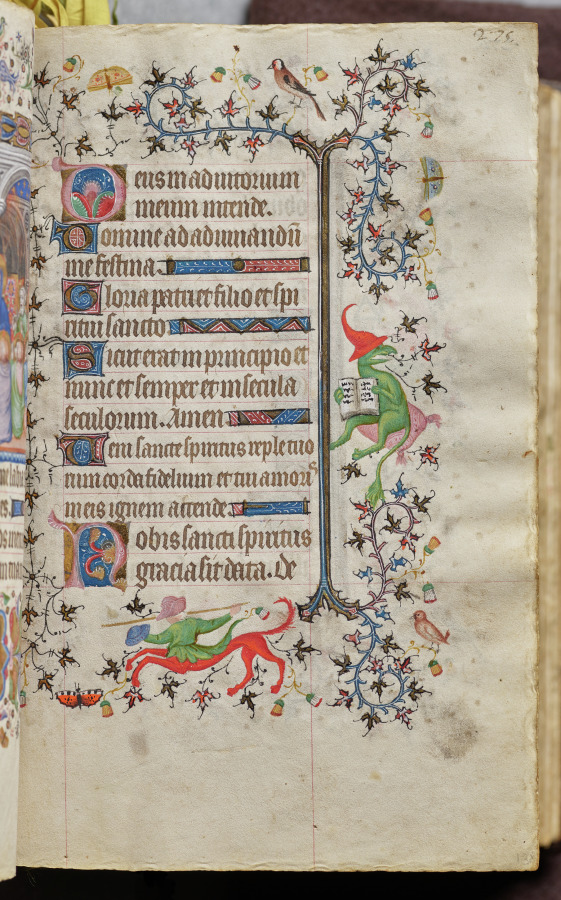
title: Hours of Charles the Noble, King of Navarre (1361-1425): fol. 138r, Text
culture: France, Paris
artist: Master of the Brussels Initials and Associates (French)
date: c. 1405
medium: ink, tempera, and gold on vellum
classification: Bound Volume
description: This precious volume was obviously highly prized by its owner, the French-born King of Navarre, who had his coat of arms painted on no less than twenty folios. Rather than directly commissioning this manuscript from a specific workshop, it seems that Charles the Noble acquired his book of hours -- perhaps ready-made for the luxury market -- while on a trip to Paris in 1404-05. A collaborative effort, six painting styles are evidenced within the pages of this codex, those of two Italians, two Frenchmen, and two Netherlanders. The painter who was responsible for the planning and decoration of the book, and who produced seventeen of the large miniatures, was a Bolognese artist known as the Master of the Brussels Initials. His principal assistant, responsible for most of the borders, was a Florentine who signed his name "Zecho" da Firenze on folio 208 verso.